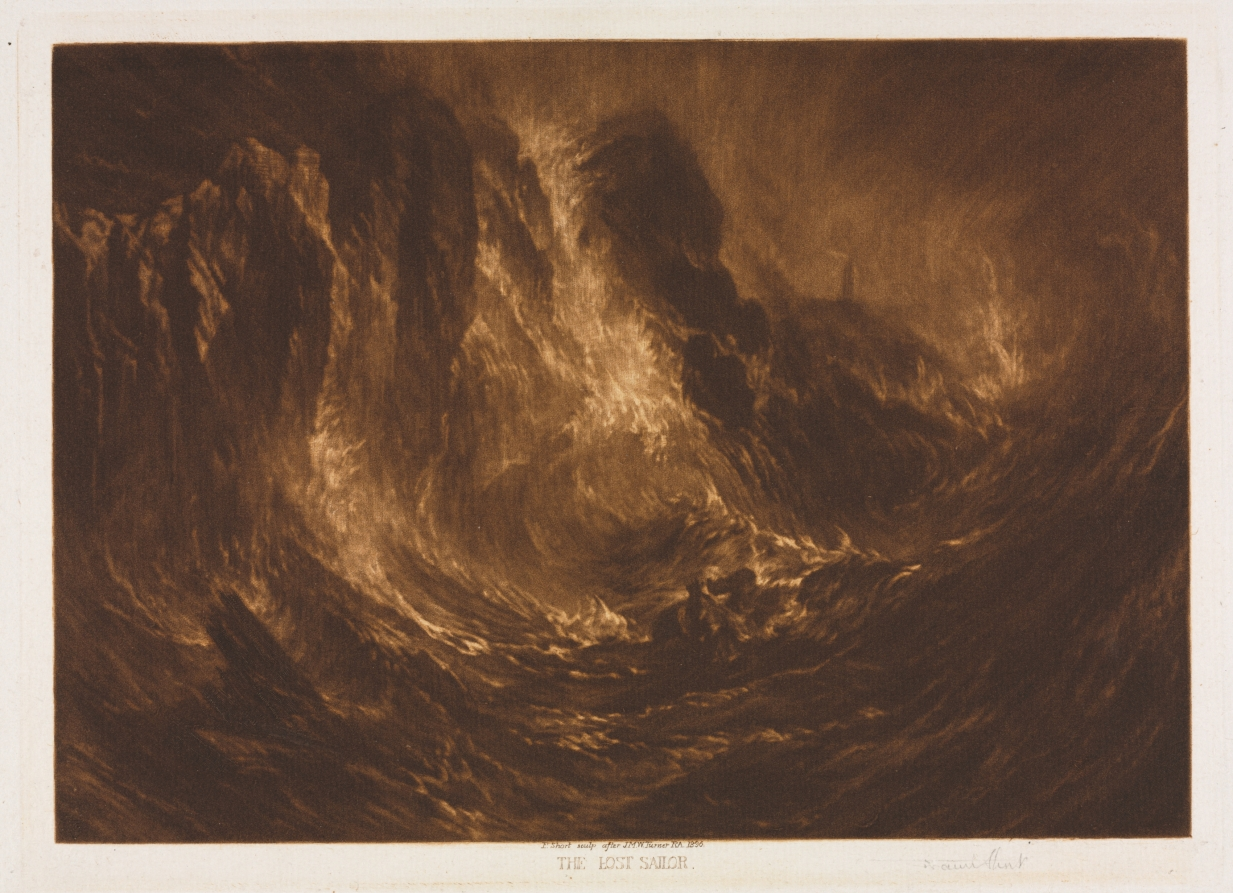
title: The Lost Sailor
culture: England, 19th century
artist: Frank Short (British, 1857–1945)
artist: after Joseph Mallord William Turner (British, 1775–1851)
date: 1896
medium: mezzotint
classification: Print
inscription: Lower right, in pencil: "Frank Short" Printed below image: "F. Short sculp after JMW Turner RA1896 The Lost Sailor"